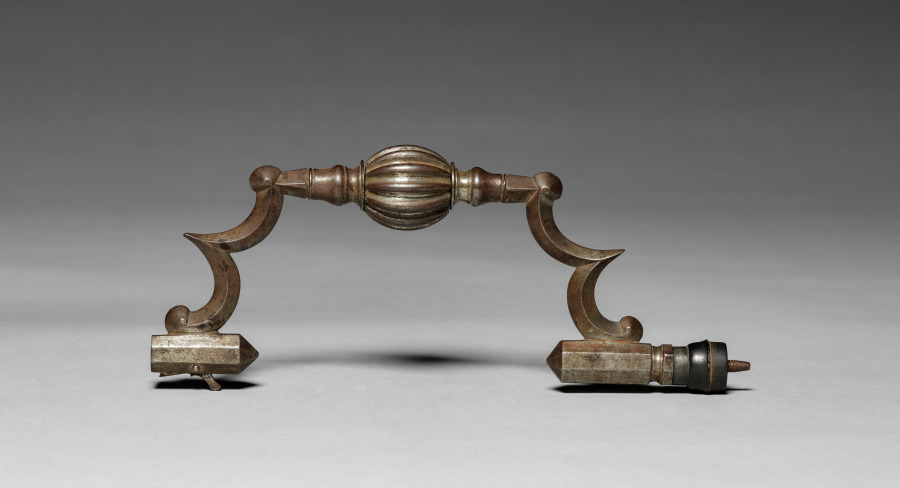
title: Brace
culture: Europe, 17th-18th century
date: 1600s–1700s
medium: metal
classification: Tool